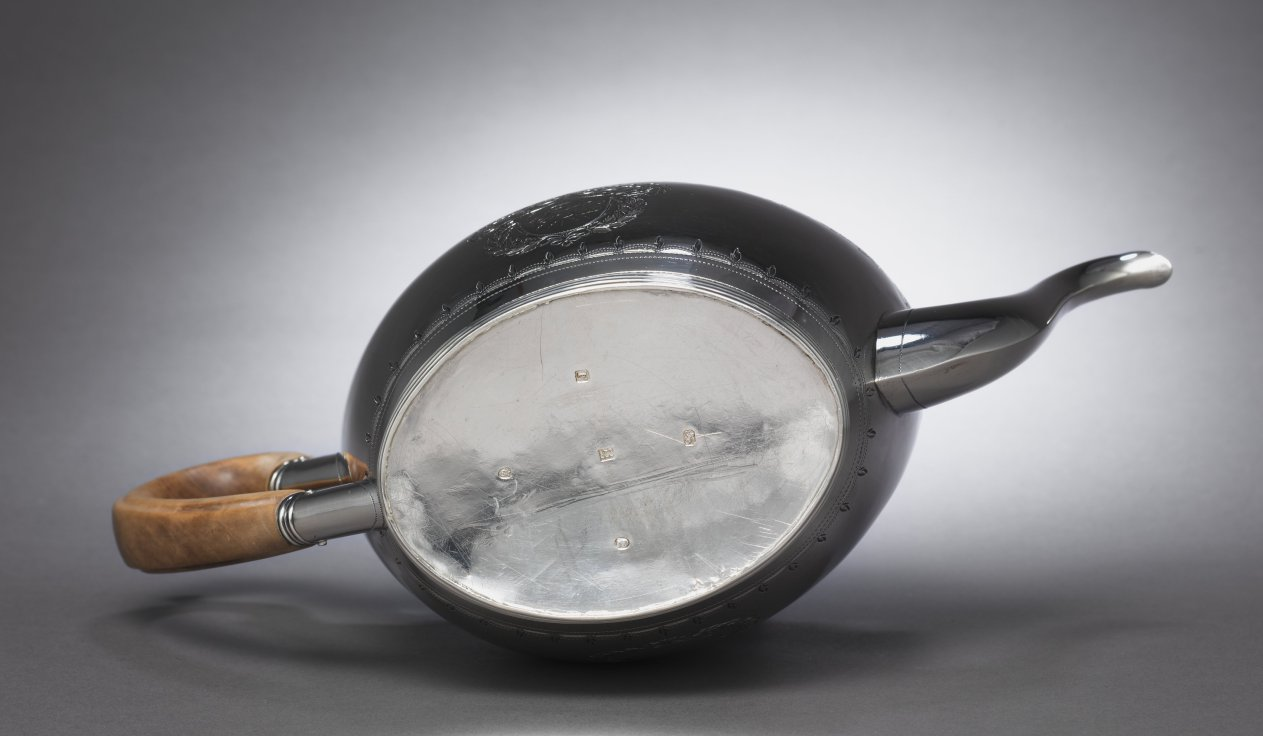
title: Tea Service (Teapot)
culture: London, England, 19th century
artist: Anne Bateman (British, 1748–1813)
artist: Peter Bateman (British, 1740–1825)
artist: William (I) Bateman (British, 1774–1850)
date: 1801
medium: silver, ivory, wood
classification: Silver